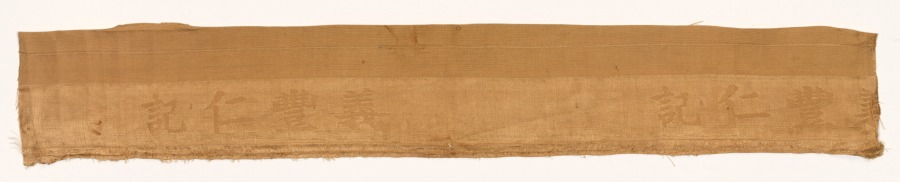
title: Fragment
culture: China, Qing dynasty (1644-1911)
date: 1800s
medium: silk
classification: Textile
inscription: 記仁豐義